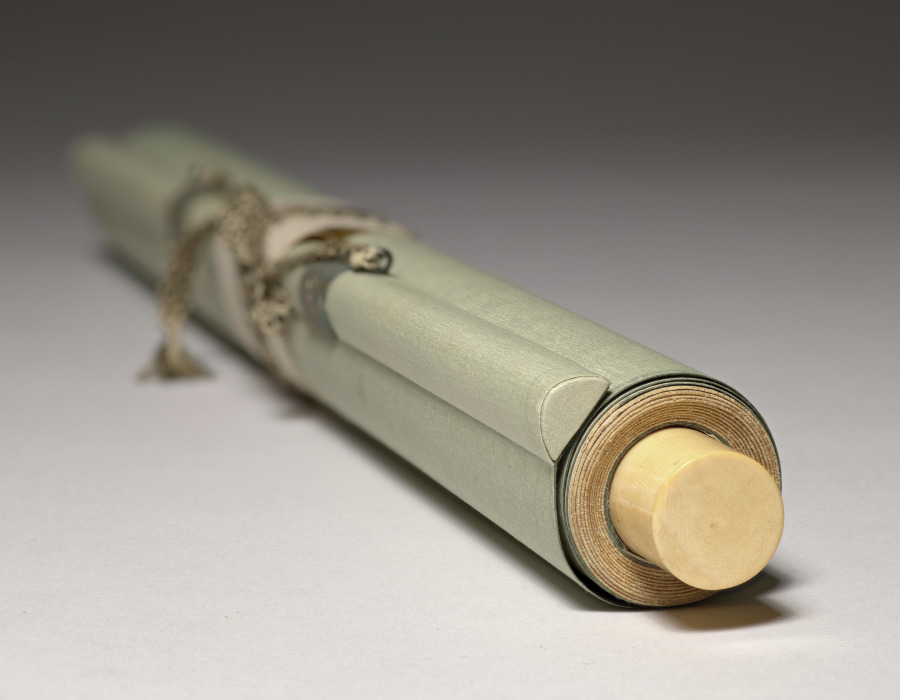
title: Plum Tree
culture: Japan, Edo period (1615–1868)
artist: Ogata Kōrin (Japanese, 1658–1716)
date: c. 1700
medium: hanging scroll; ink on silk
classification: Painting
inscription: Artist's signature and seal above hillock bottom right corner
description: Ogata Kōrin had to think through his design carefully to create these white plum blossoms and deliver their effect, as he used the reserve technique—where selected areas of the painting surface are left unpainted—to achieve it. He probably roughed in the tree before applying an ink wash to the entire silk surface, except where he intended to place the flowers. He likely then returned to articulate the petals and, in some cases, the pistils and stamens. The composition shows the tree twisting out of view, only to return with a branch of new growth jabbing forth from an old, broken limb, thereby heightening the visual impact of the blossoms.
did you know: The Rinpa style of painting is named for Ogata Kōrin, even though he did not create it.